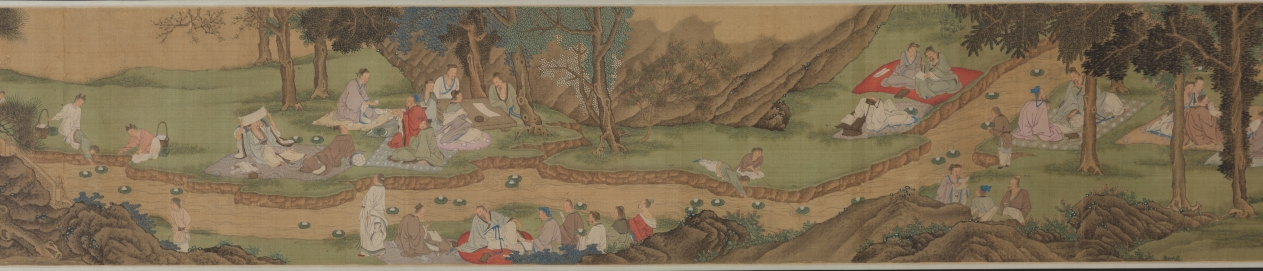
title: Purification at the Orchid Pavilion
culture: China, Qing dynasty (1644-1911)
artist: Fan Yi (Chinese, c. 1615–before 1688)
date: 1671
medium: Handscroll; ink and color on silk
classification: Painting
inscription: Artist's inscription, signature, and 2 seals: Painted by Fan Yi of Zhongfu during the second month of winter of the xinhai year [1671]. [2 seals] Fan Yi zhi yin, Zi yu yi.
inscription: Title on the frontispiece by Monk Yueshan (1629-1709).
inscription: 3 colophons and 13 additional seals: 1 colophon, dated 1707, and 6 seals of Yueshan; 2 colophons and 3 seals of Wong Kwan-Shut (Huang Junshi) 黃君實 (b. 1934); 2 seals of Fu Shen 傅 申 (b. 1937); 2 seals of Tessai Tomioka 富岡鐵齋 (1836-1924).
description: By the 1600s, the historic gathering at Lanting, Zhejiang province, in 353 CE was a common theme in Chinese painting. Originally based on a composition attributed to Li Gonglin (1049– 1106), now lost, Wu school artists revived the theme. Fan Yi, the brother of the artist Fan Qi from Nanjing, used delicate brushwork and luminous colors to depict the spring gathering.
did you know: The gathering’s host is in the Orchid Pavilion at the end of the scroll, representing an episode known as “Wang Xizhi Watching the Geese 王羲之觀鵝圖.”